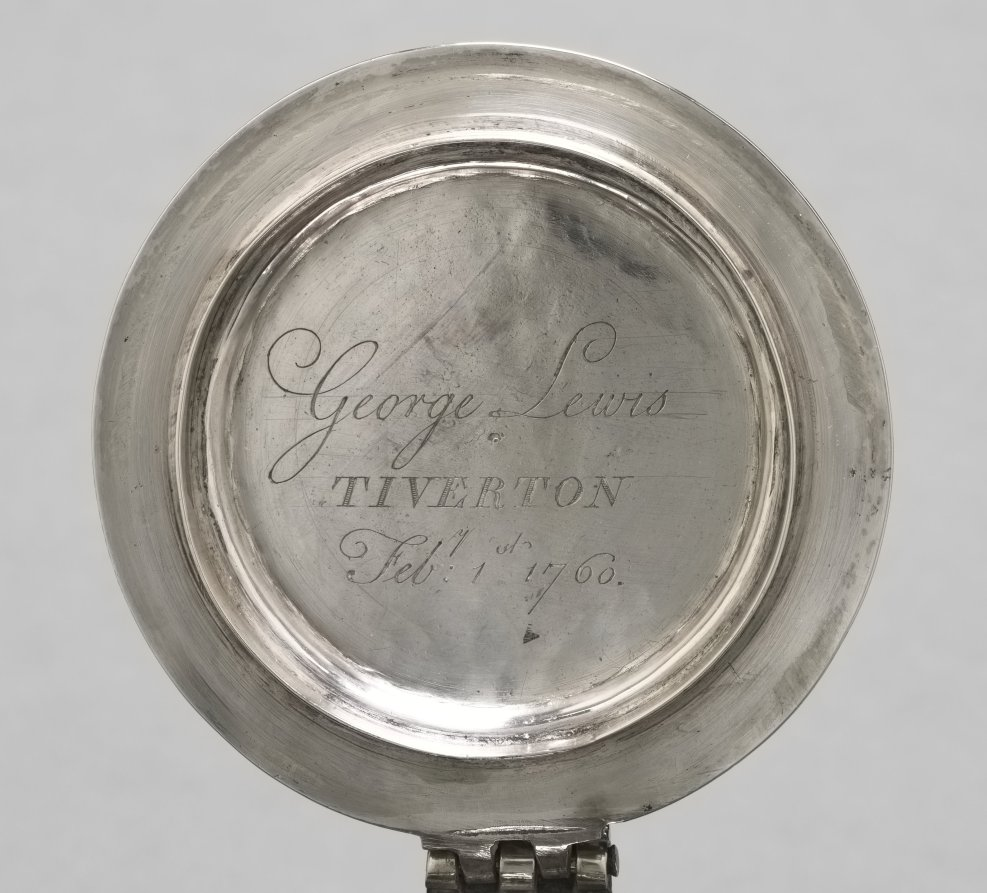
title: Coconut Cup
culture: carved coconut, probably The Netherlands; silver mount, probably England, 17th century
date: c. 1630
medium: carved coconut in silver mount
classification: Metalwork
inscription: top lid has engraved coat-of-arms, underside of lid has inscription: George Lewis TIVERTON Feby, 1st 1760.